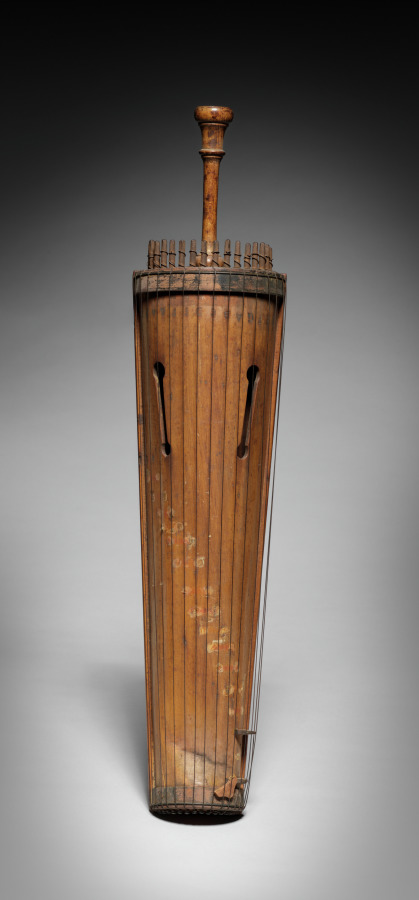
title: Psaltery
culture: China, Qing dynasty (1644-1911)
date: 1800s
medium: wood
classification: Musical Instrument